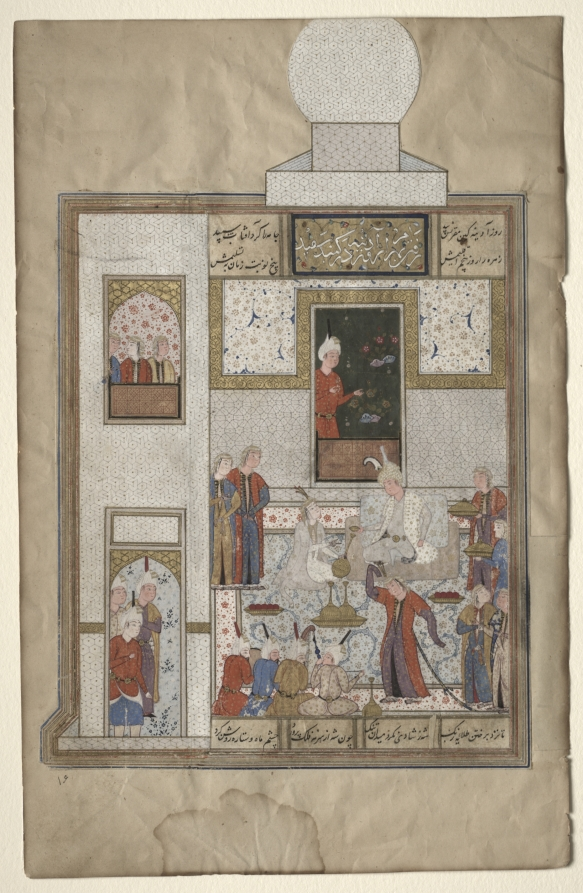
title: Bahram Visits the White Domed Pavilion on Friday (recto)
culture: Iran, Shiraz, Safavid period (1501-1722)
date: c. 1560–80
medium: opaque watercolor, ink, and gold on paper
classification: Manuscript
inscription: Script: Nasta'liq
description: The Haft Paykar is an epic romantic poem that tells the story of the Sasanian king, Bahram Gur (ruled AD 420–38). The story relates how the king had an architect construct seven domed pavilions with different colors for each of his seven beautiful brides who came from different parts of the world. On each day of the week, the king visited one princess and enjoyed her company. In the center of this scene, sits Bahram and his bride from Iran dressed in resplendent white garments. Attendants bring them food and drink, while a dancer and an ensemble of musicians entertains them.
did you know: The wife recounts a tale with dancing fairies, suggested by the girl dancing to music in the foreground of the painting.